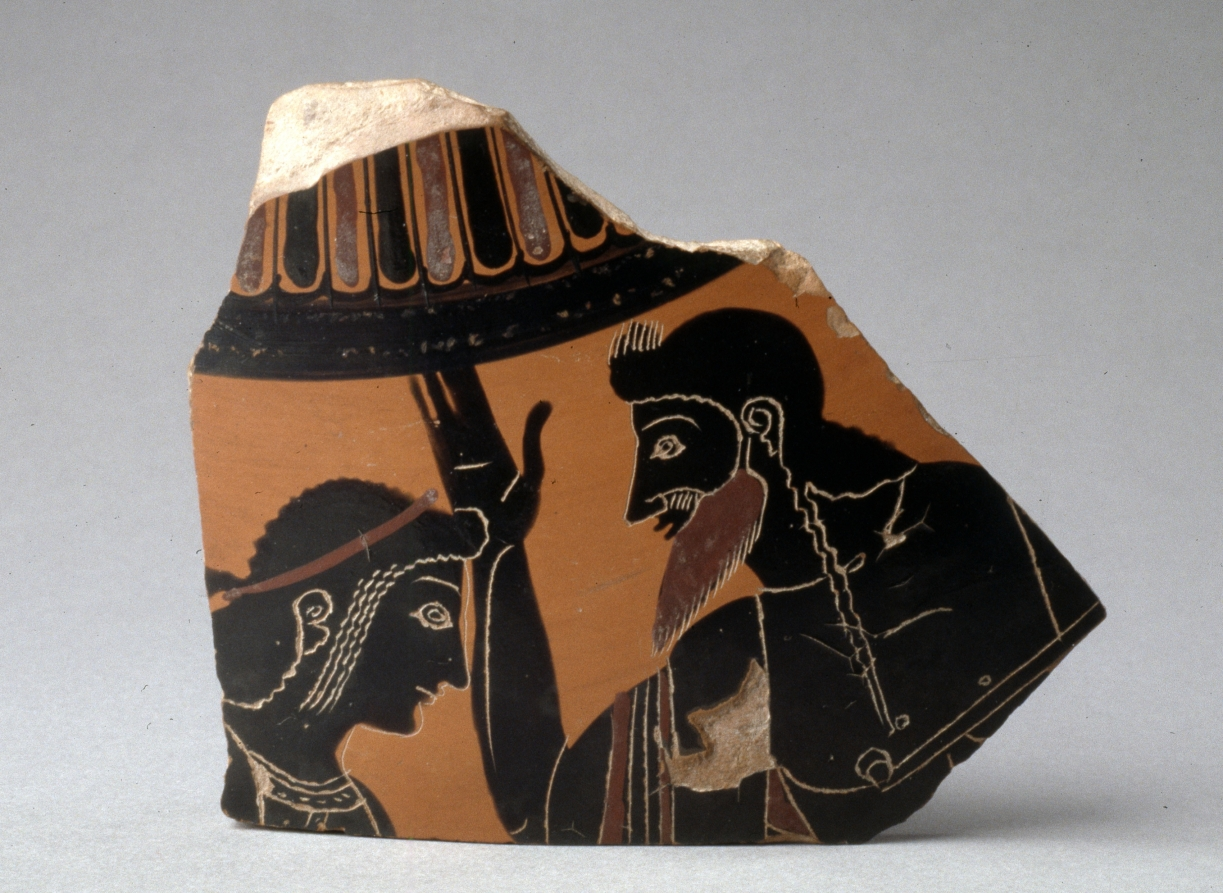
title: Fragment from Black-Figure Neck-Amphora of Panathenaic Shape (Storage Vessel): Apollo and Zeus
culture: Greek, Attic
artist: manner of Antimenes Painter (Greek, Attic, active c. 530–510 BCE)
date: c. 520 BCE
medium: ceramic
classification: Ceramic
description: Comparison with better-preserved vases—and with other artworks and monuments, such as the famous Siphnian Treasury at Delphi—helps to fill in some of the action no longer surviving from the rest of this vase, which once showed Apollo and Herakles struggling for the Delphic tripod. One claw-footed leg of the tripod survives, across the chest of Zeus, the bearded figure who intervened to stop the quarrel between two of his sons. Apollo is the unbearded figure at left, while Herakles would have appeared beyond the break on the right.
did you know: The claw-footed tripod leg before Zeus's chest identifies the scene—the struggle for the Delphic tripod.